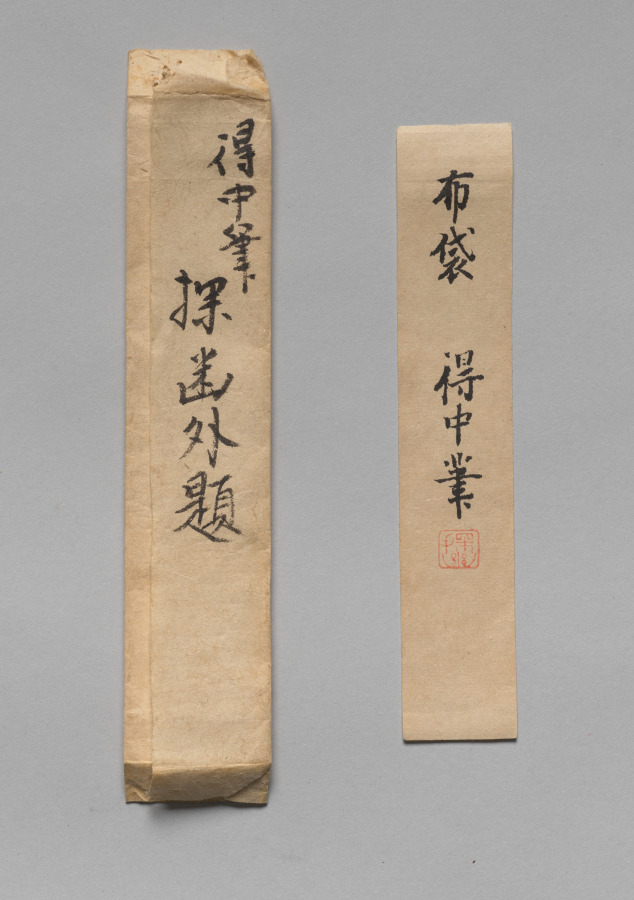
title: Hotei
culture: Japan, Muromachi period (1392–1573)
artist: Tokuchū (Japanese, late 1400s)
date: late 1400s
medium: hanging scroll; ink on paper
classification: Painting